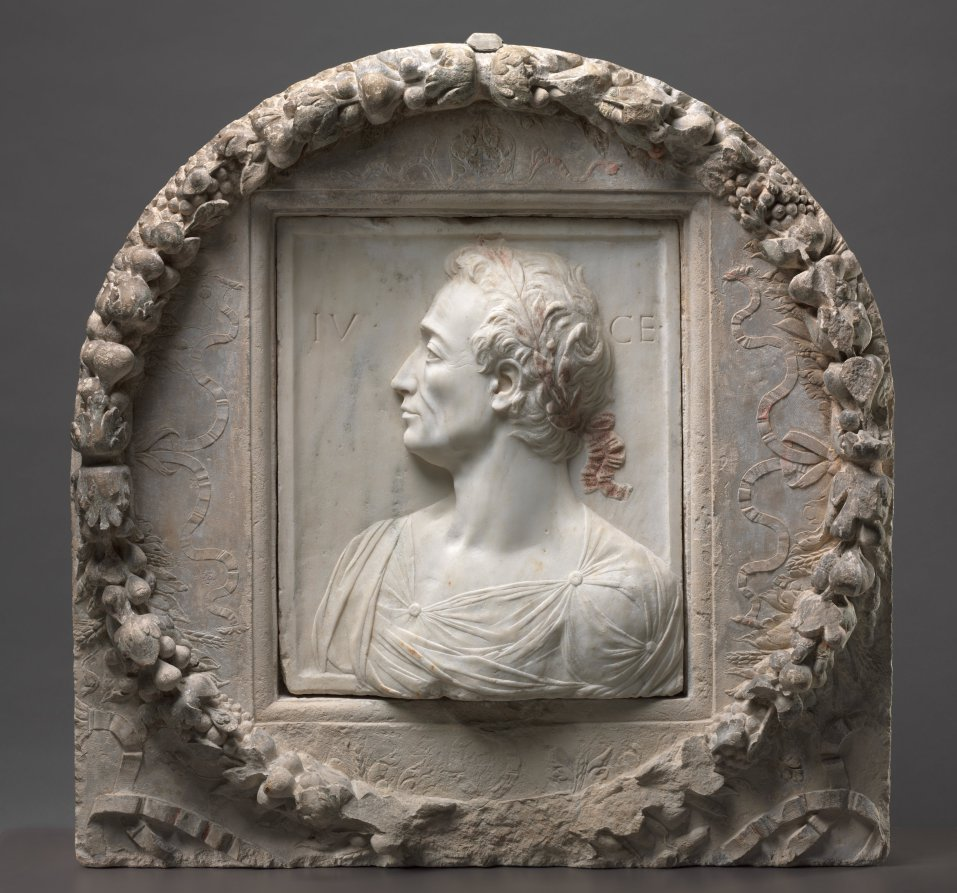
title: Julius Caesar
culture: Italy, Florence, 15th century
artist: Mino da Fiesole (Italian, c. 1430–1484)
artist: garland by Mino da Fiesole and Workshop (Italian, c. 1430–1484)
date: c. 1455–60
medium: marble with traces of bole (red clay) and limestone with traces of paint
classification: Sculpture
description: Renowned Roman general and statesman Julius Caesar (100–44 BCE) appears here as a political rather than military leader, worn by the burdens of office, with carefully described signs of aging. Mino probably used ancient coins from the collection of the Medici, Florence's ruling family, as his starting point for this sculpture. However, the complex carving, the clinging drapery, and the psychological intensity all characterize the inventiveness Renaissance artists brought to classical subject matter. In this case, Caesar offered an important model for leadership, masculinity, and composure. The garland is clearly by a different hand, but passages, such as the ribbons and flowers in low relief, correspond to details found in other decorative carvings from Mino's workshop. Initially, the limestone setting was probably put into a wall, perhaps in a lunette over the door, from which it was later removed. However, the relationship between the garland and the relief has not yet been clarified and is the subject of ongoing research.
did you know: Traces of paint on this white marble relief indicated that it was once brightly painted.